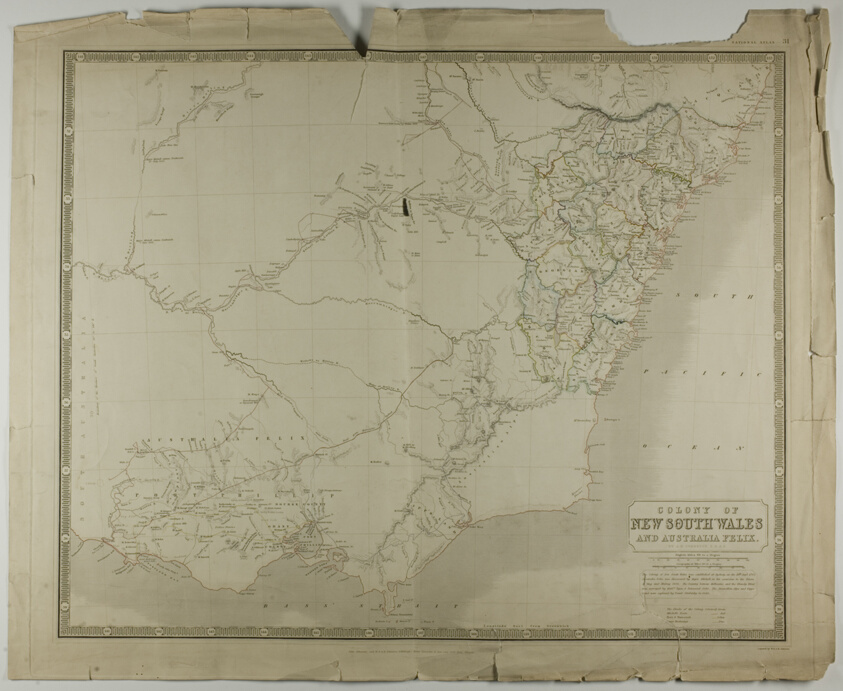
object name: Print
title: Colony of New South Wales and Australia Felix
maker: W & A. K. Johnston (Scottish, active 18th-19th century); published by W & A. K. Johnston and John Johnstone (Edinburgh, 19th century); and James Lumsden & Son and Robert Weir (Glasgow, 19th century)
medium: Engraving in black with hand-coloring on cream wove paper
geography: Scotland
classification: print; prints and drawing